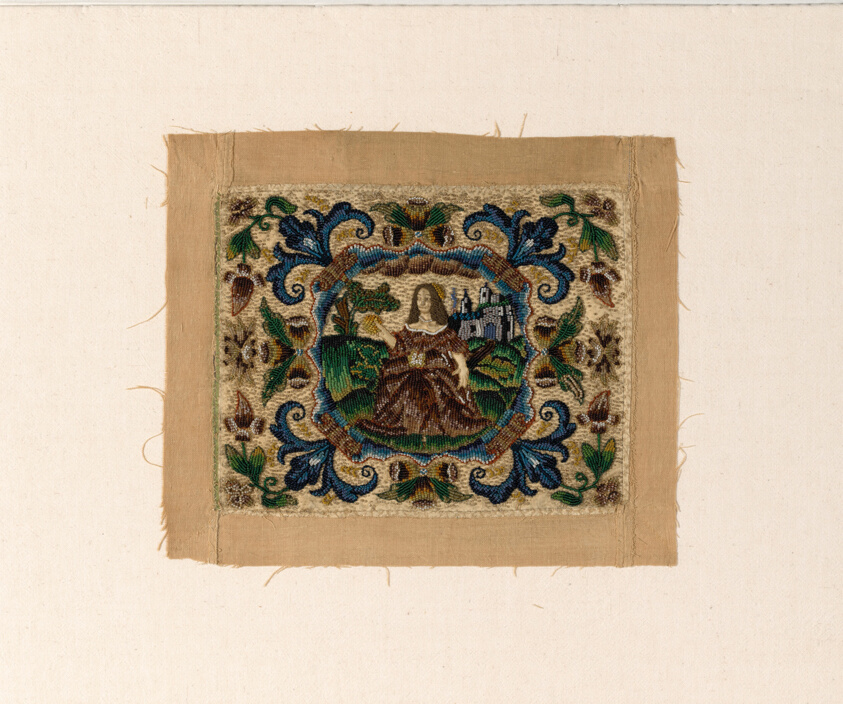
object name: Textile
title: Picture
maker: England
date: 18th/19th century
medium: Silk, satin weave; appliquéd with silk over paper; embroidered with silk in laid work and couching; beaded with glass beads and seed pearls; edged with cotton, plain weave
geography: England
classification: textile; needlework (visual works)